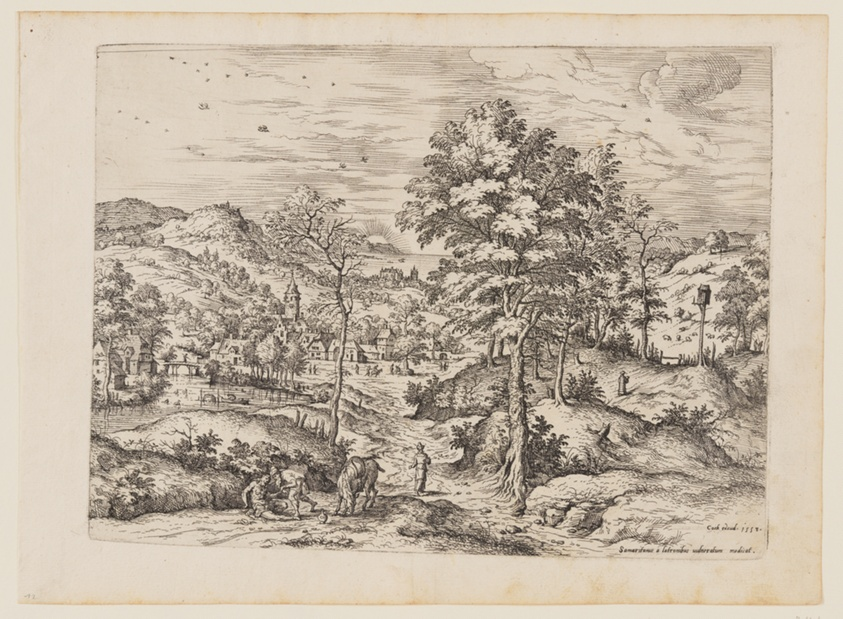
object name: Print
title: The Good Samaritan, from Landscapes with Biblical and Mythological Scenes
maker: Hieronymus Cock (Netherlandish, c. 1510–1570); after Matthys Cock (Netherlandish, c. 1505-1548)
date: 1558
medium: Etching on ivory laid paper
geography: Netherlands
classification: etching; paper; print; prints and drawing